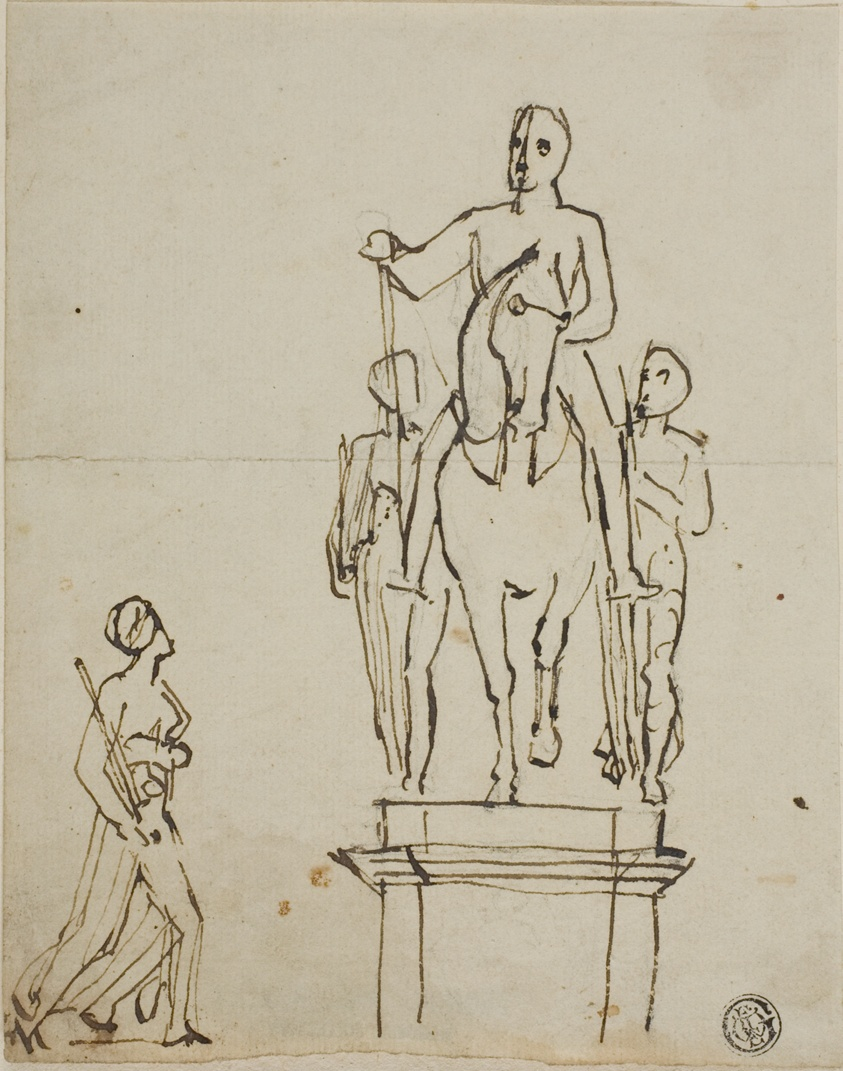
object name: Drawing and Watercolor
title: Sculpture of Horseman Accompanied by Two Standing Figures, with Sketch of One of Latter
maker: Attributed to Thomas Stothard; English, 1755-1834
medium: Pen and brown ink over graphite, on gray laid paper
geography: England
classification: pen and ink drawings; drawings (visual works); prints and drawing